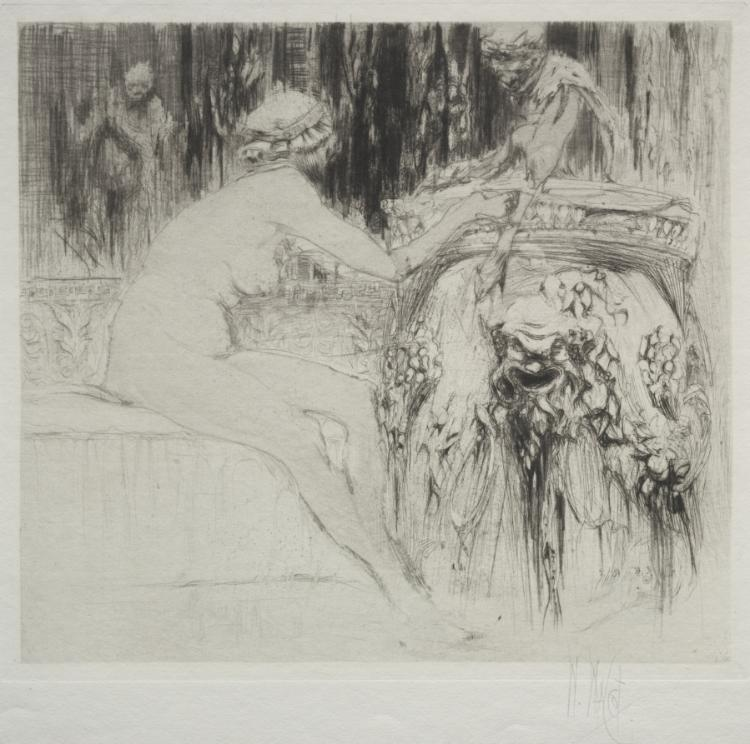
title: The Bacchante and the Young Faun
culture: England, 20th century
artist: William Walcot (British, 1874–1943)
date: c. 1911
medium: etching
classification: Print